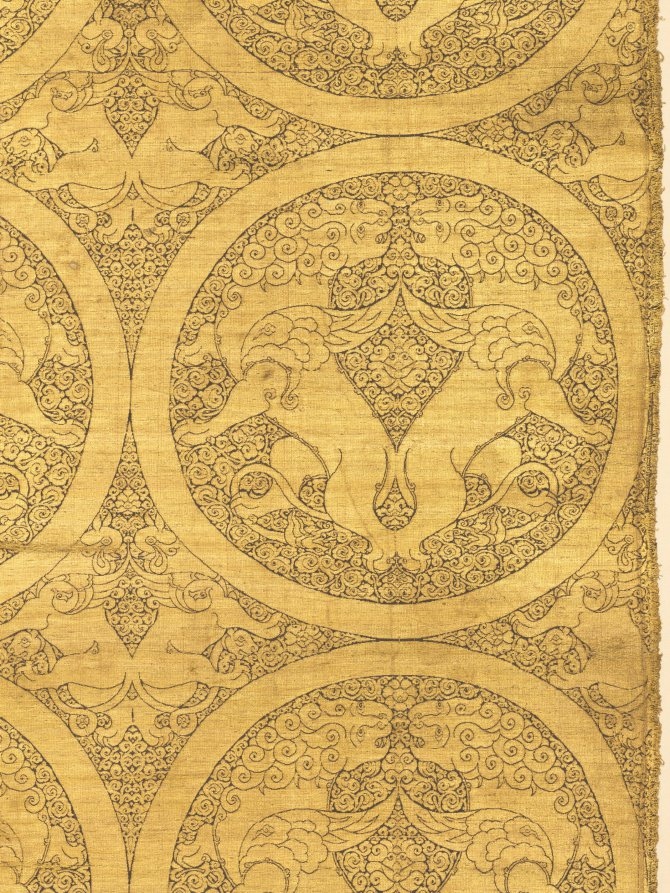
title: Cloth of gold with winged lions and griffins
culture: Central Asia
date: 1225–75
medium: Silk and gold thread: lampas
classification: Textile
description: The Mongols created exceptionally sumptuous cloths of gold to symbolize their imperial authority and legitimacy, this being the most resplendent example known. Opulent expanses of gold thread enrich the roundels, lions, and griffins in striking contrast with the intricate brown silk foliate ground. The pattern integrates motifs from Iran—paired lions in roundels and paired griffins—and from China, cloud ornaments on the lions’ wings. They suggest it was woven in an imperial workshop in Central Asia where Iranian and Chinese craftsmen worked together with local artisans. The gold is on a paper substrate associated with Asia, whereas animal skin substrates were used in Islamic lands. It is woven in a new technique developed by Iranian weavers, a combination of two weaves known as lampas, which was adopted internationally.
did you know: The tail of each paired griffin passes between its hind legs, loops around a rosette, and terminates in a feline head.